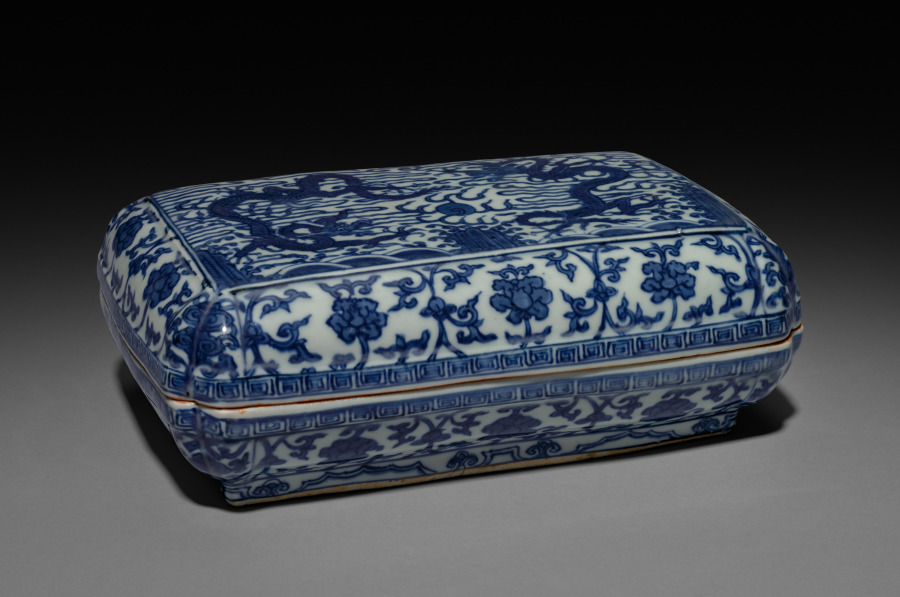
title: Covered Box with Dragons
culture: China, Jiangxi province, Jingdezhen kilns, Ming dynasty (1368-1644), Wanli reign (1572-1620)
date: 1573–1620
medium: porcelain with underglaze blue decoration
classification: Ceramic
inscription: 大明萬曆年製